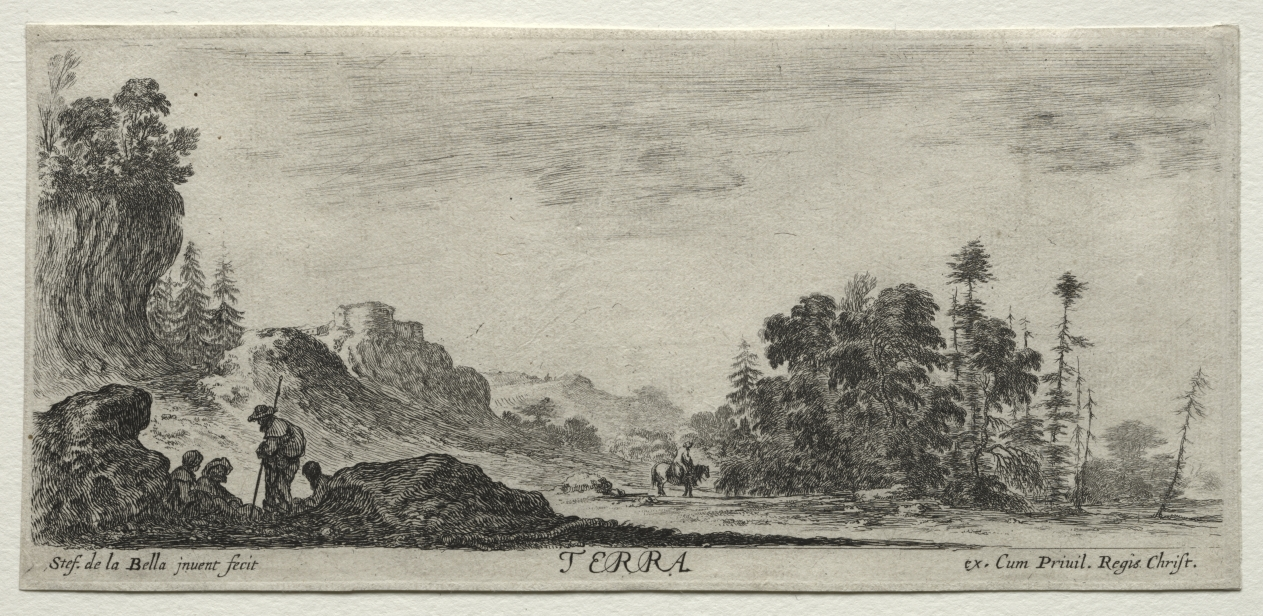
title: The Four Elements: Terra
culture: Italy, 17th century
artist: Stefano Della Bella (Italian, 1610–1664)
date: c. 1648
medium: etching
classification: Print